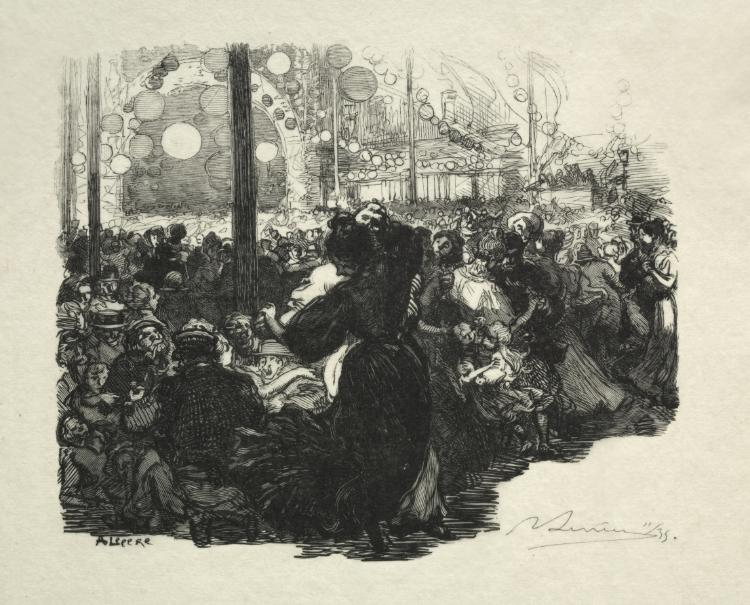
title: 14 Juillet, Rue de Belleville, 10 heures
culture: France, 19th-20th century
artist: Auguste Louis Lepère (French, 1849–1918)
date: 1889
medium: wood engraving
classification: Print